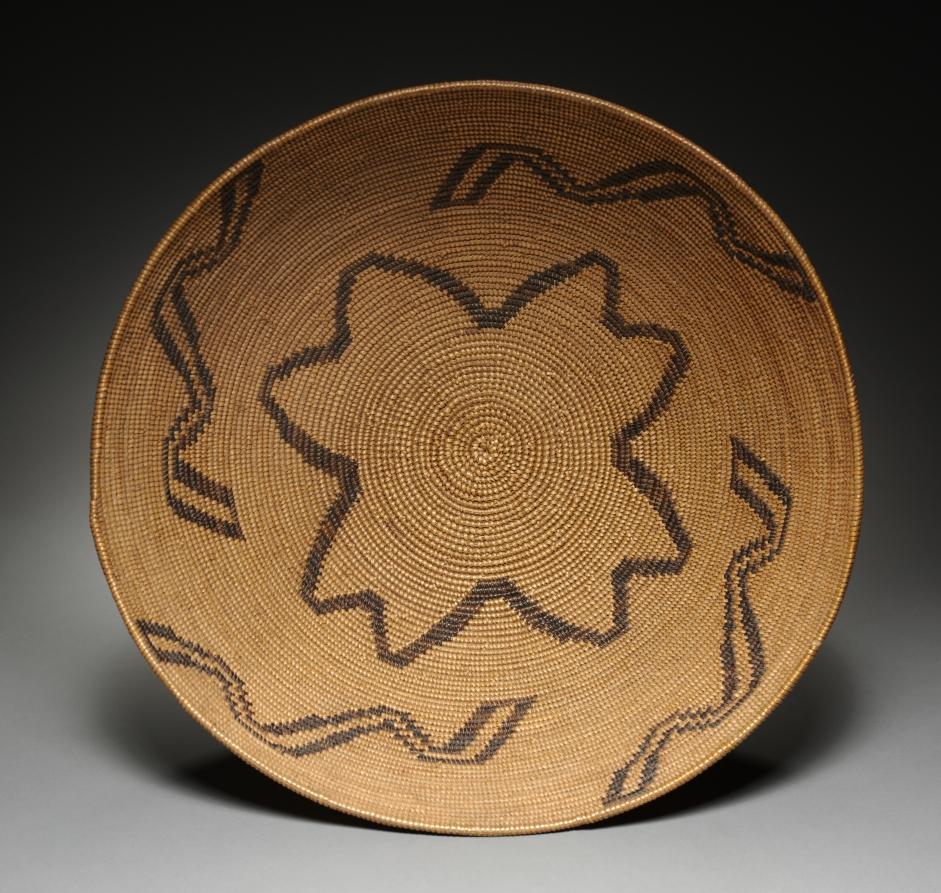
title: Food Bowl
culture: California, Southern, Gabrielino (San Gabriel, Mission or Tongva), Late 19th- Early 20th century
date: c 1875– 1925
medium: coiled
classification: Basketry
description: CMA Bulletin, December 1930